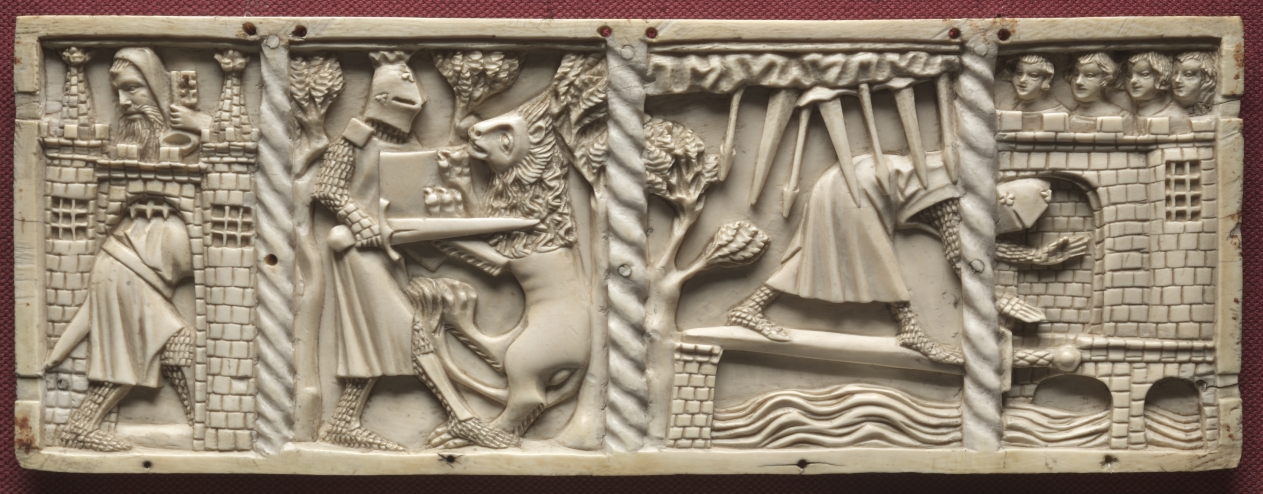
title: Panel from a Casket with Scenes from Courtly Romances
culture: France, Lorraine?, Gothic period, 14th century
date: 1330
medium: ivory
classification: Ivory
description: Among the most lavish and deluxe products of French ivory workshops of the 1300s were large caskets carved with elaborate scenes drawn from courtly romances. This panel shown here comes from such a casket. This side panel depicts scenes such as Sir Gawain and the Lion and Lancelot crossing the sword bridge. These images suggesting chivalry, fertility, virginity, youth, and an idealized courtly love likely derive from manuscripts including the Roman de la Rose and the poems of Chrétien de Troyes. Such texts were often found within the libraries of the aristocracy, so the casket’s symbolic images would have been readily understood. Such caskets may have originally been gifts between a man and a woman. The expense of the material, ivory, suggests they were produced for an elite clientele.